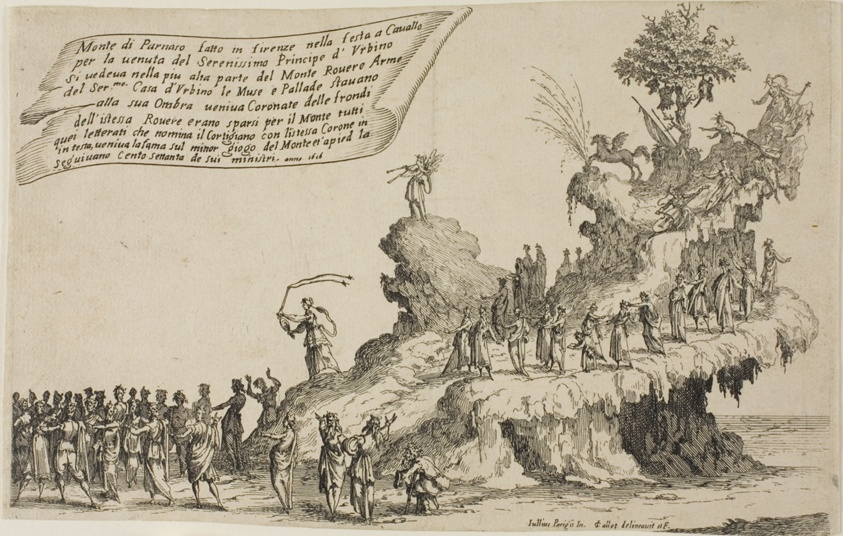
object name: Print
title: The Float of Mount Parnassus, from The War of Beauty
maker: Jacques Callot (French, 1592-1635)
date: 1616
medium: Etching on paper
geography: France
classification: etching; print; prints and drawing